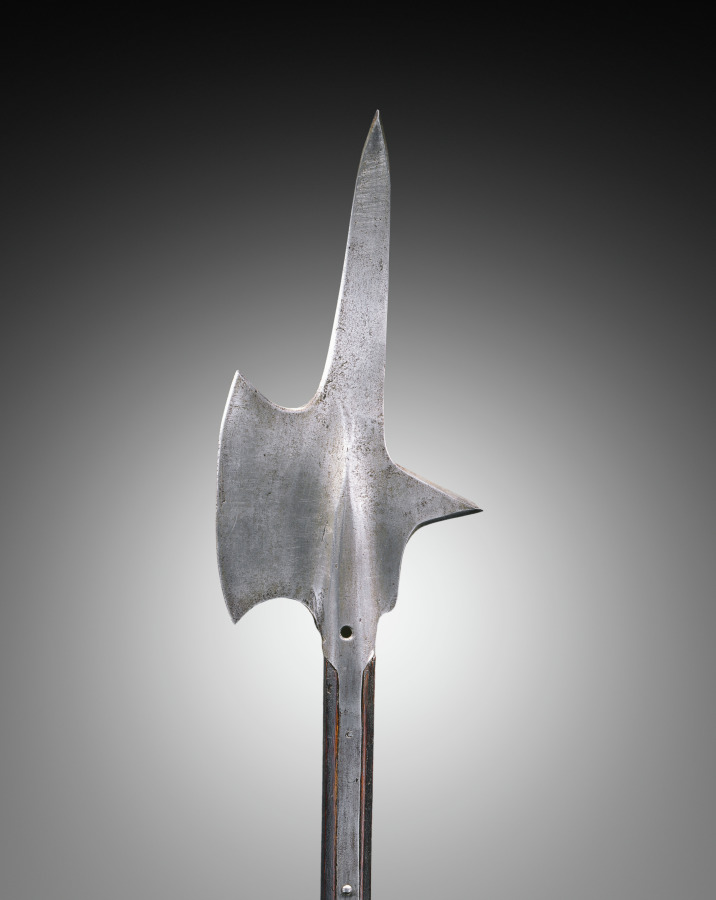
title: Halberd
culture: Switzerland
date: 1600s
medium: steel; rectangular wood haft with planed corners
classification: Arms and Armor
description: The halberd was a staff weapon favored by European infantries (foot soldiers) of the 1400s and 1500s for its versatility and deadly effect. The word halberd comes from the German words Halm (staff) and Barte (axe). The halberd is, in fact, an axe that served multiple functions: the axe blade was used for hacking, the spike for thrusting, and the beak for piercing plate armor or for pulling a knight from his saddle. The halberd was used by shock troops (those who lead an attack) and by Swiss and German mercenaries. After about 1550, the halberd gradually became less functional. Its large blade provided space for coats of arms and insignia. By the late 1500s, the parade halberd had become a ceremonial weapon for palace guards.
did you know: By the mid-1500s halberds started to change in appearance; elements were exaggerated to become more ornamental.